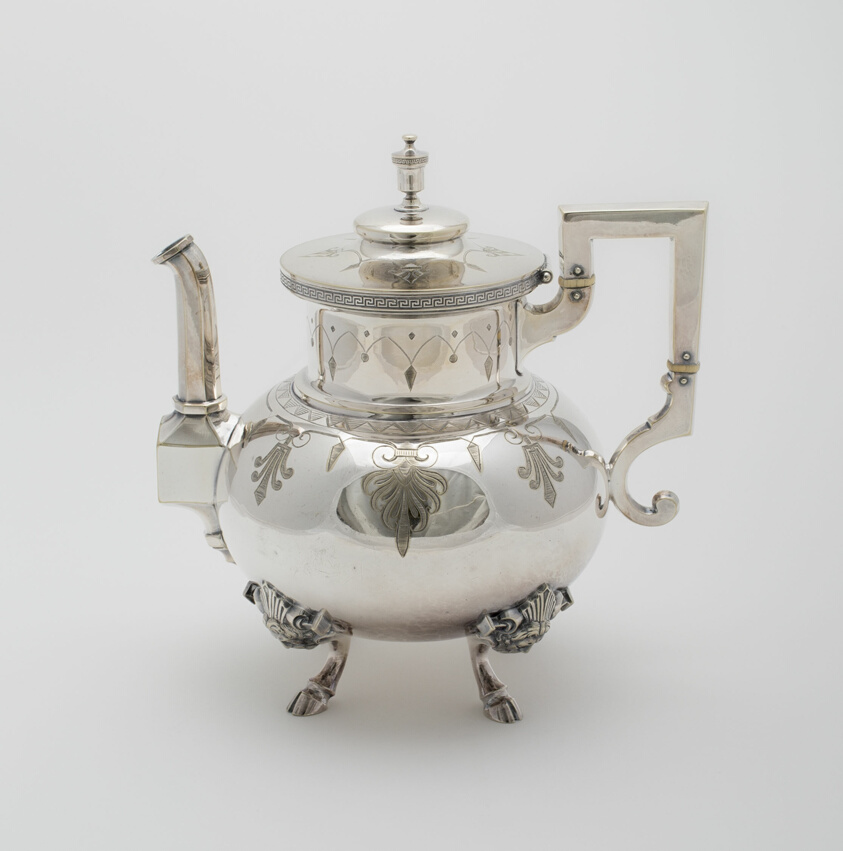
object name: Metalwork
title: Teapot, part of Tea and Coffee Service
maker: Rogers, Smith, and Company (American, 1862–c. 1900); Meriden, Connecticut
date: 1878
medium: Silver with ivory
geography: Connecticut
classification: tea service; teapot; decorative arts